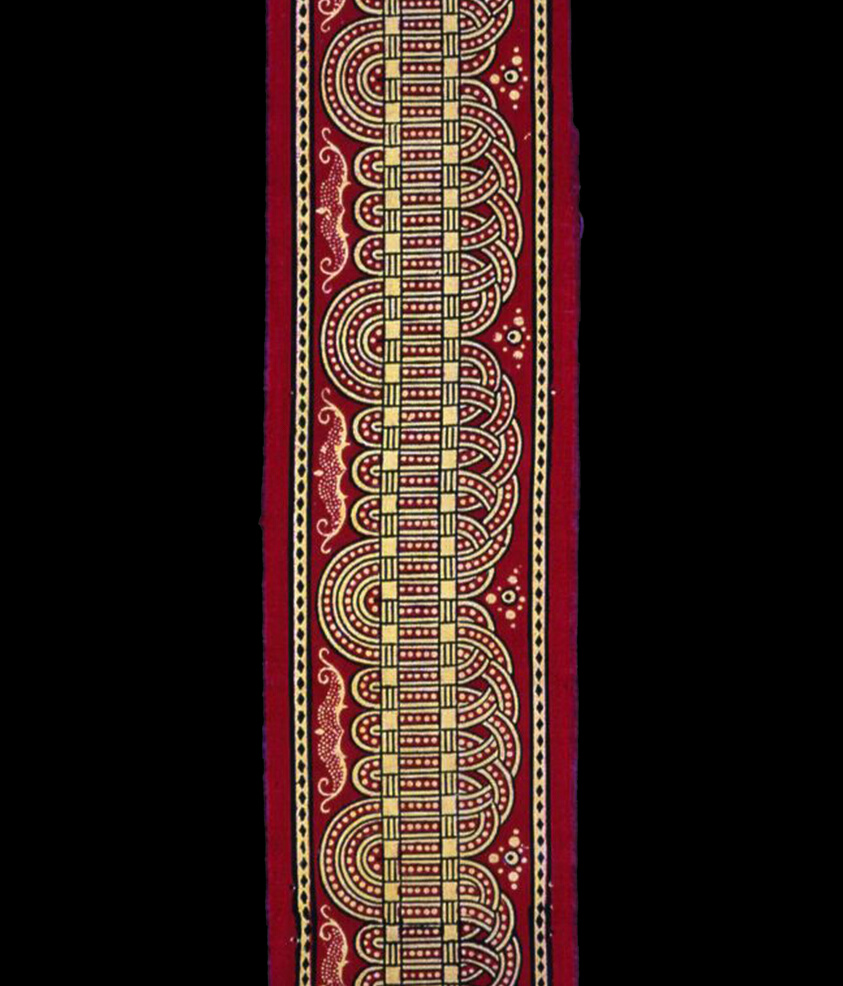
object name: Textile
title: Border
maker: England or United States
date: 19th century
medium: Cotton, plain weaver; block printed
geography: England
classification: textile; weaving - printed